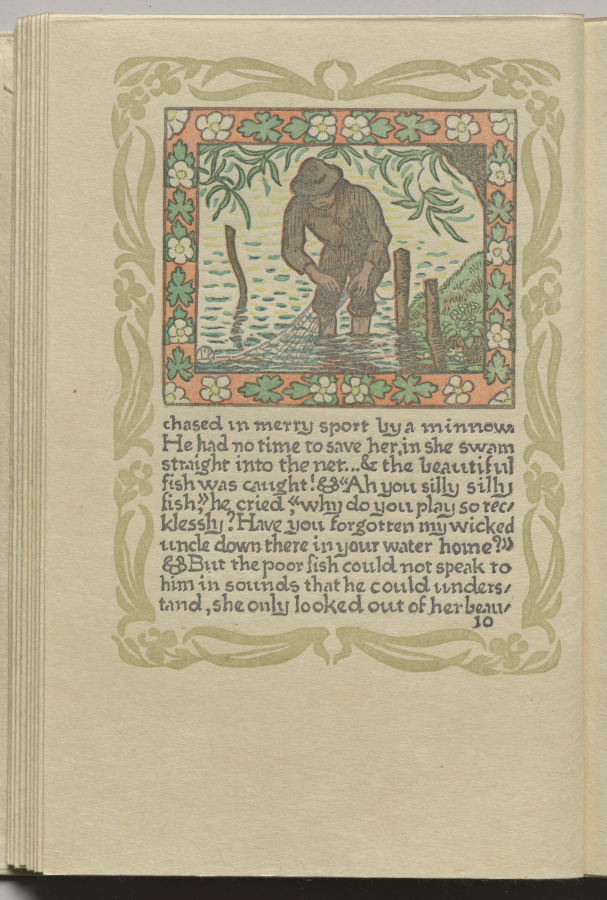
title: The Queen of the Fishes: Plate 10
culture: England, 19th century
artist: Lucien Pissarro (British, 1863–1944)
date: 1894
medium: color woodcut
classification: Bound Volume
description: Pissarro, son of the French Impressionist artist Camille Pissarro, moved to England in 1890. By 1894 he and his wife, Esther Bensusan Pissarro, had bought a printing press and established the Eragny Press. Influenced by William Morris, they were involved in every step of the production process: designing, cutting the woodblocks, setting type, and printing. The first book published by Ergany Press, The Queen of the Fishes, is based on an old fairy tale in which a peasant boy and girl escape the hardships of their lives by fantasizing that they have been turned into a giant oak and a splendid fish, respectively.